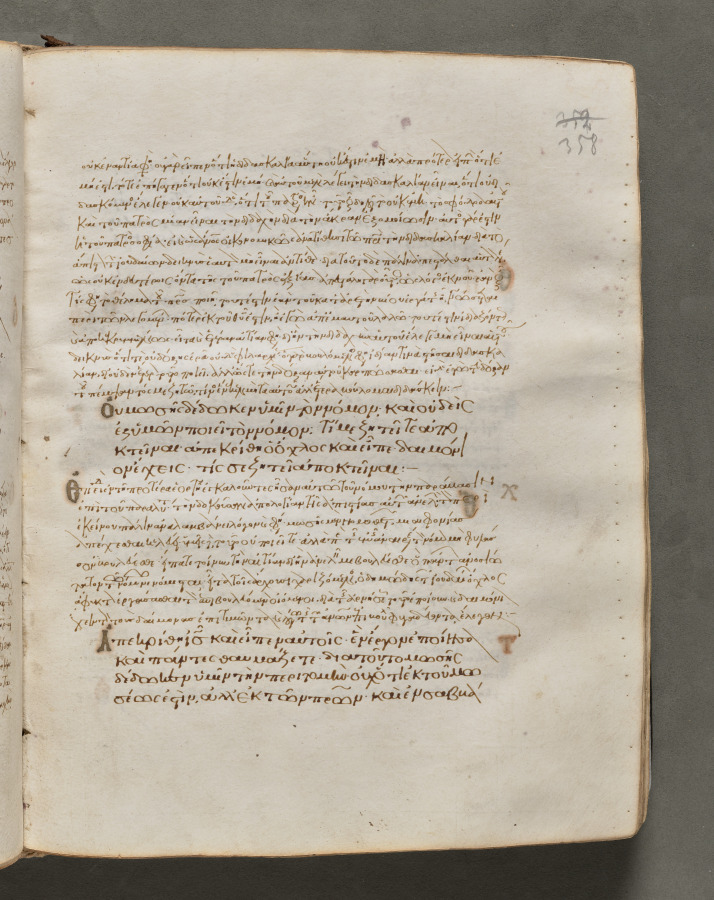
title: Text, folio 358 (recto), from a Gospel Book with Commentaries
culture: Byzantium, Constantinople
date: c. 1000–1100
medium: ink, tempera, and gold on vellum; leather binding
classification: Bound Volume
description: Each of the four gospels in this book opens on a page with brilliantly illuminated borders depicting the author of the text as well as birds—principally peacocks, symbols of the immortality of the soul—and fountains, representing the fountain of life and the salvation of the soul. This volume consists of 428 leaves with texts in Greek. Its level of sophistication suggests that it was probably written and decorated in a monastery in Constantinople.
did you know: Gospel books were carried in procession through Byzantine churches.